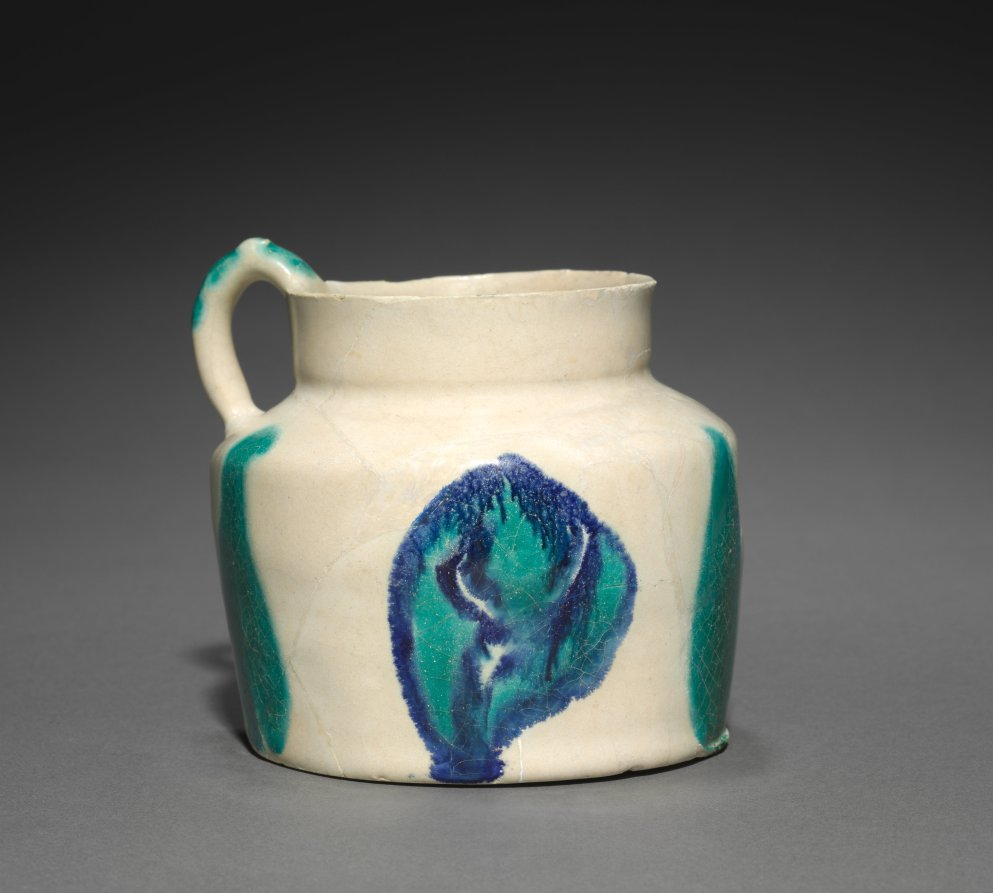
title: Earthenware Jug painted with Blue and Turquoise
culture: Iraq, Basra, Abbasid Period, 9th century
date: 800s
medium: earthenware with overglaze-painted design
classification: Ceramic